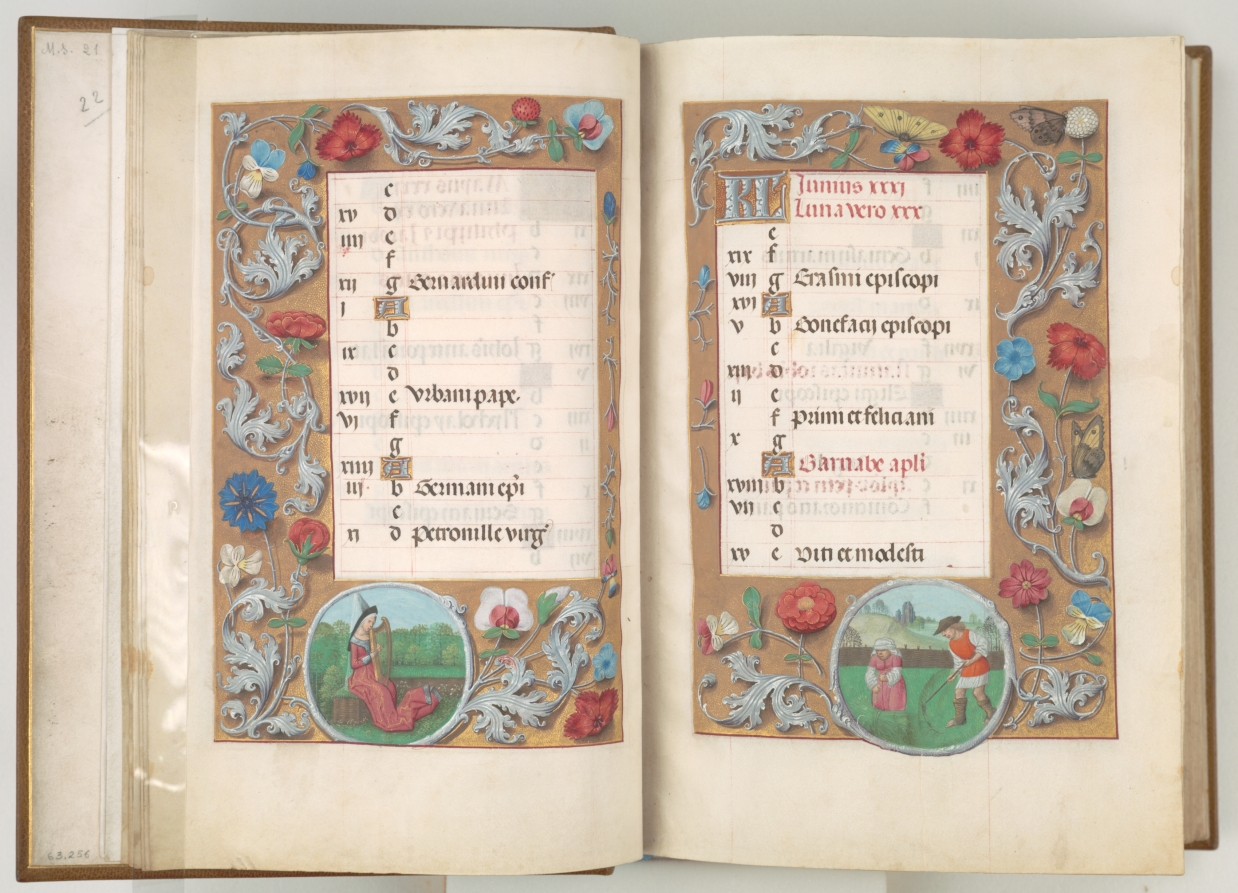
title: Hours of Queen Isabella the Catholic, Queen of Spain: Fol. 6v, May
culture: Flanders, Ghent and Bruges, late 15th century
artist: Master of the First Prayerbook of Maximillian (Flemish, c. 1444–1519)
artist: and Associates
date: c. 1500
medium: ink, tempera, and gold on vellum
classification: Bound Volume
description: A great lover of Flemish art, Queen Isabella treasured her many devotional books. This deluxe manuscript was created for her private devotions by highly organized and distinctly talented manuscript painters active in Ghent and Bruges. The Ghent-Bruges school represents the culmination of Flemish book painting, whose main features were the use of rich colors, illusionistic effects, a love of landscape, and a strong sense of visual narrative. Manuscripts produced by this circle of artists are renowned for their border decoration featuring a rich variety of realistically painted flowers, scrolling acanthus leaves, birds, and butterflies.